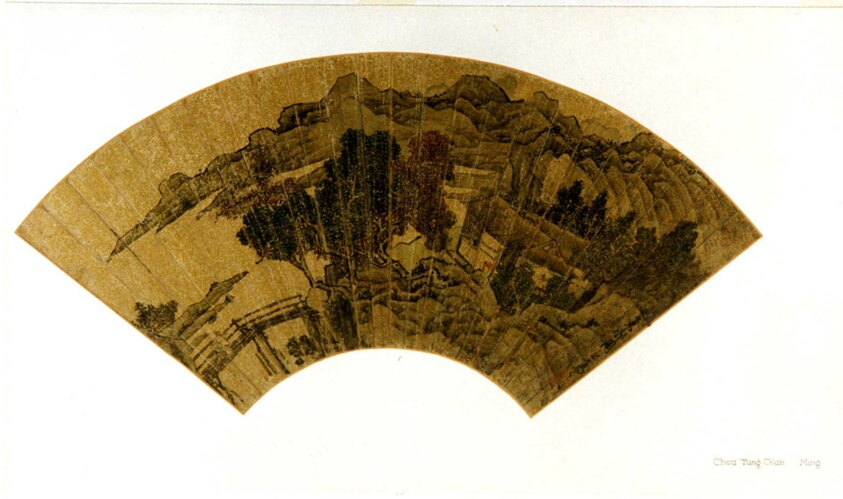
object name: Painting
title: Landscape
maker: Attributed to Zhou Chen (Chinese, c.1450–c.1536)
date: Ming Dynasty (1368–1644)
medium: Folding fan mounted as an album leaf; ink and color on gold paper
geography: China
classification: album leaf; painting; asian art